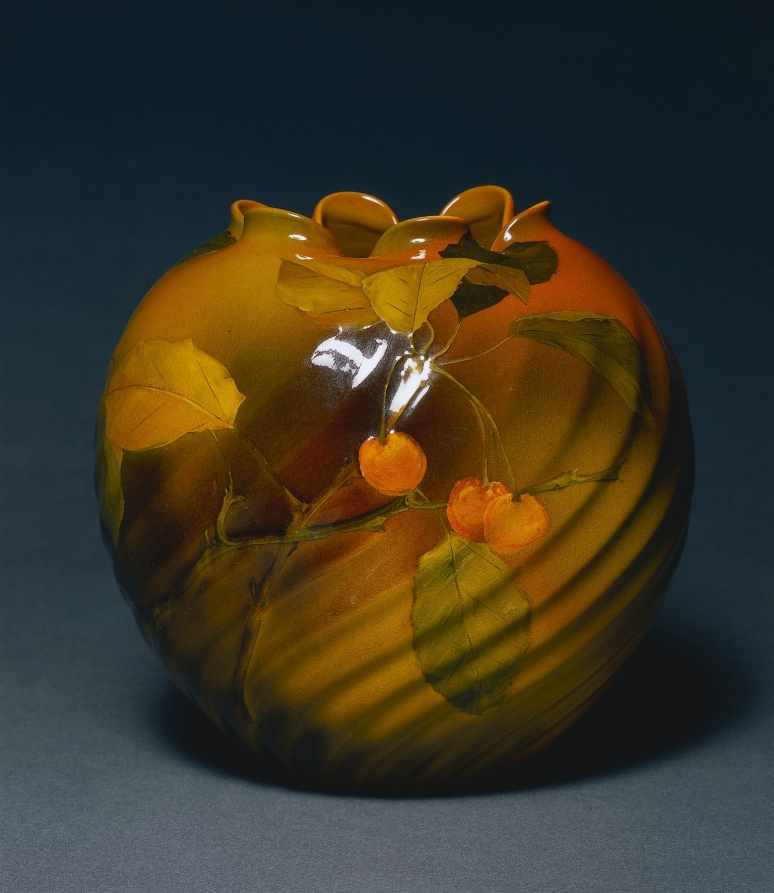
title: Vase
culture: America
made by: Rookwood Pottery Company (American, established 1880)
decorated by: Olga Geneva Reed (American, 1873–1955)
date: 1893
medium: earthenware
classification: Ceramic